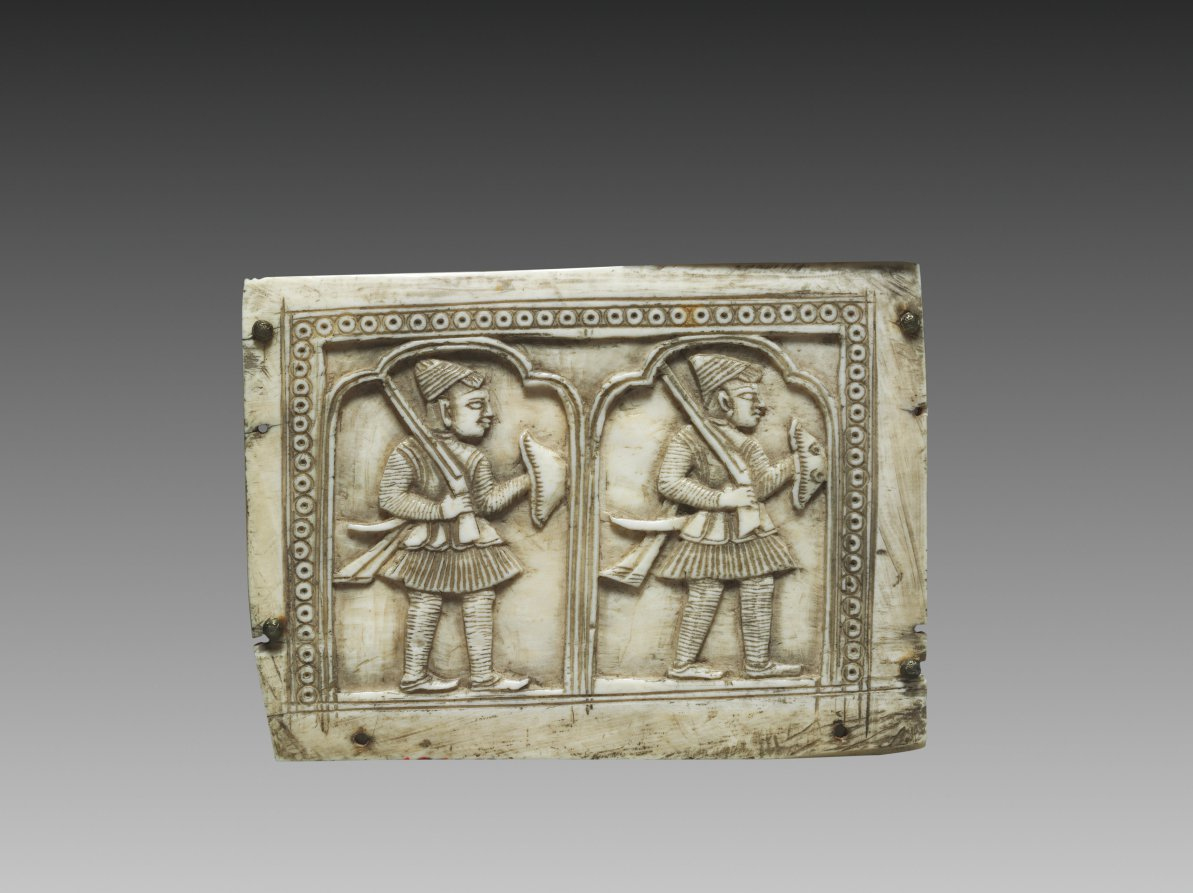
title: Panel from a Box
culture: India, North East Deccan, Visakhapatnam district, Mughal Dynasty (1526-1756)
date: c. 1700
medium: ivory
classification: Ivory